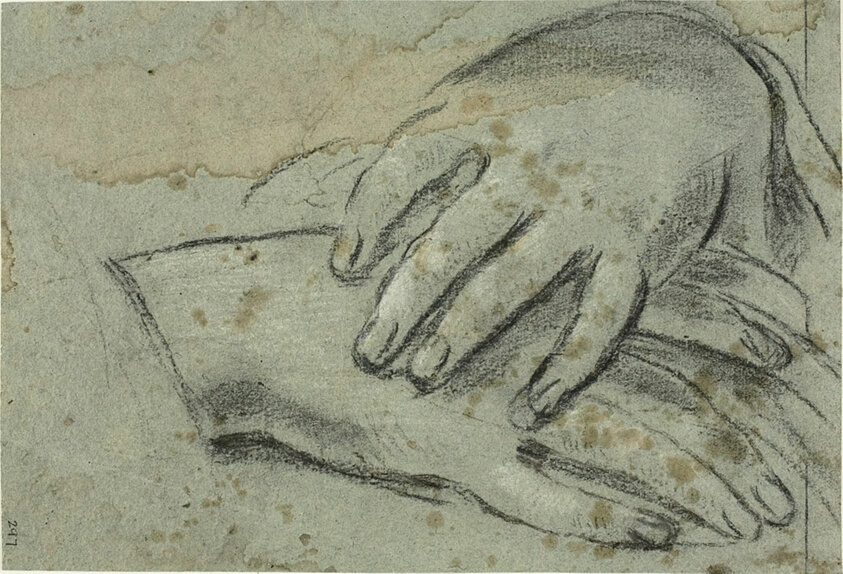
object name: Drawing and Watercolor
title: Crossed Hands (recto); Right Foot, Partially Covered by Drapery (verso)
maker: Jacopo Cavedone; Italian, 1577-1660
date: 1625/29 (recto); c. 1620 (verso)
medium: Charcoal, heightened with white chalk (recto and verso), on blue laid paper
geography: Italy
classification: chalk; drawings (visual works); prints and drawing